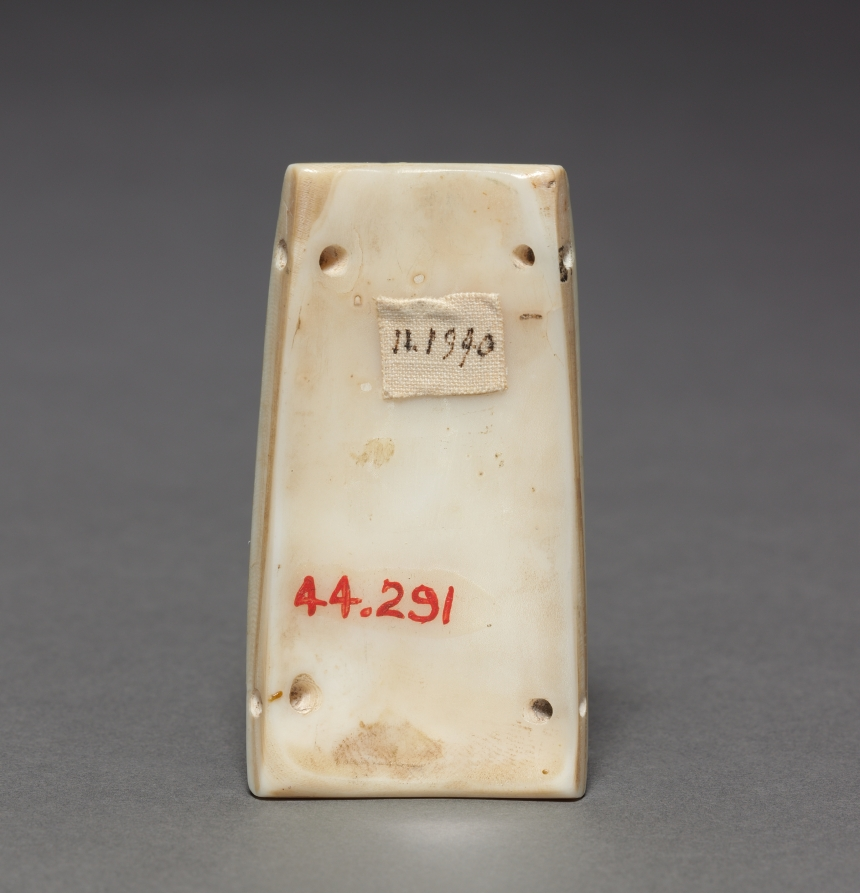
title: Ornament with Figure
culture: Central Andes, Wari style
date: 600–1000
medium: shell, stone, and metal (silver?)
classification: Jewelry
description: Affixed to a section of white shell is the image of a Wari dignitary, assembled of carefully carved mosaic elements. The purple and pink shapes are made of shell, while the green is serpentine. The spots on the figure's tunic are probably pyrite, which was originally smooth and reflective.